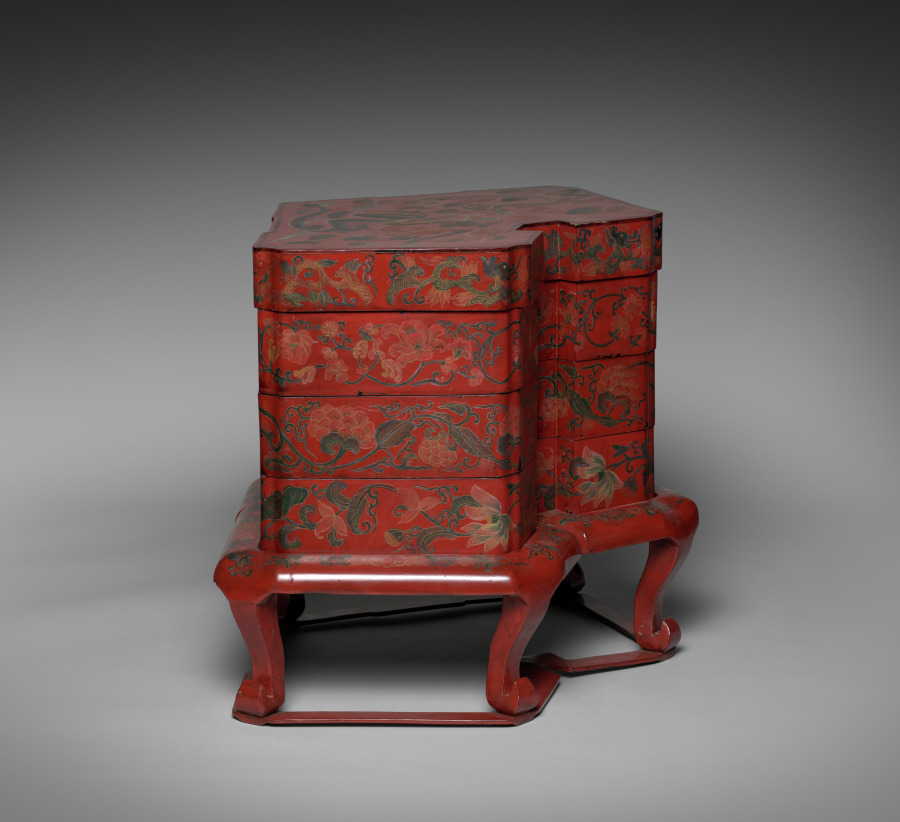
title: Tiered Food Box with Stand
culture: Japan, Edo period (1615–1868)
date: late 1700s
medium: red lacquer over a wood core, with litharge painting and engraved gold designs (Ryukyuan)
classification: Lacquer